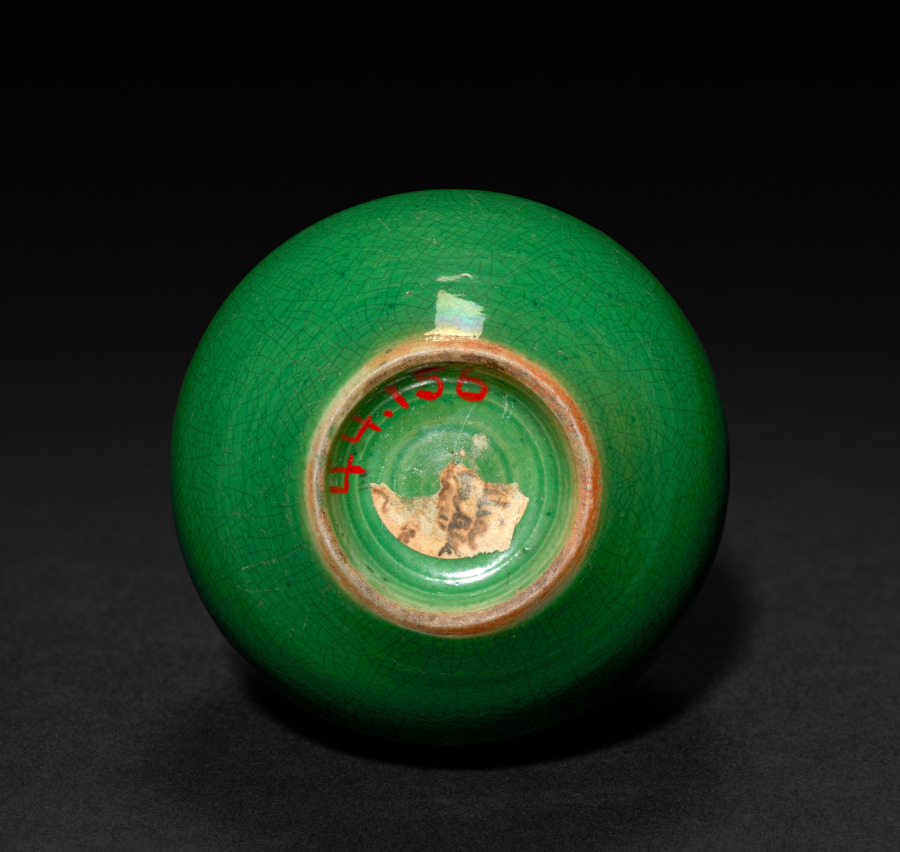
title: Bottle-Shaped Vase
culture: China, Qing dynasty (1644–1911), Qianlong reign (1736–95)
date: 1736–95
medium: porcelain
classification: Ceramic